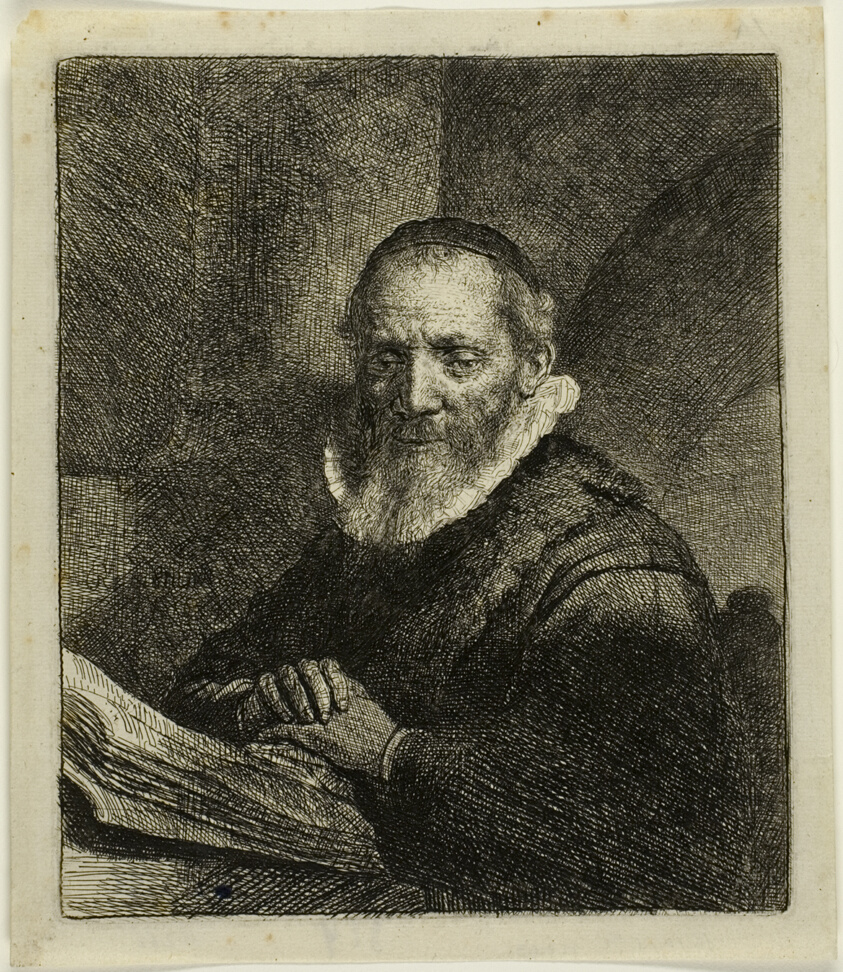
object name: Print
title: Jan Cornelius Sylvius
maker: Rembrandt van Rijn (Dutch, 1606-1669)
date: 1633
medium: Etching on paper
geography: Netherlands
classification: etching; print; prints and drawing; paper